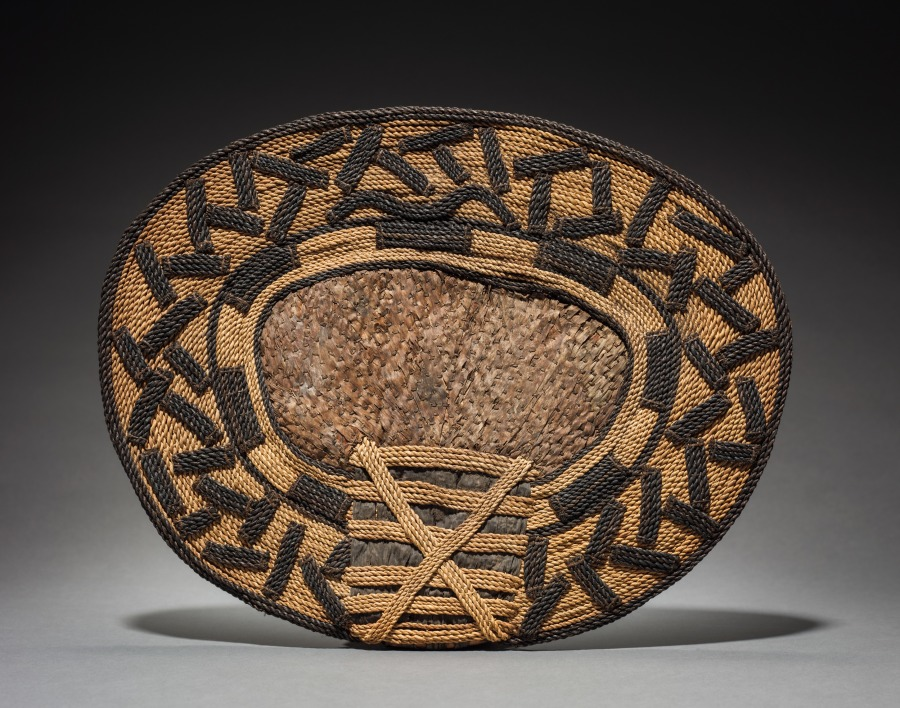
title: Back Skirt/Sitting Pad (negbe)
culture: Africa, Central Africa, Democratic Republic of Congo, Mangbetu-style makers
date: by 1928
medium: Plant fibers and dye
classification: Garment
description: Egbe (singular: negbe) were fashionable and practical garments aristocratic Mangbetu women made for special occasions. Worn over a skirt, it tied onto a girdle along with a frontal “apron.” The curved interior piece rested on the lower back. Thickly woven, flexible natural fibers bent with the body, cushioning the wearer’s behind when sitting. When the woman was standing, the decorated flat portion faced outward, showing off bold geometric motifs. Egbe were among items sold to foreigners at the Mangbetu king’s encouragement as the Mangbetu actively constructed their self image for outsiders during the 1920s and 1930s.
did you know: A contemporary fashion in 1929, when it was purchased or collected, this egbe is now a historical document of past styles.